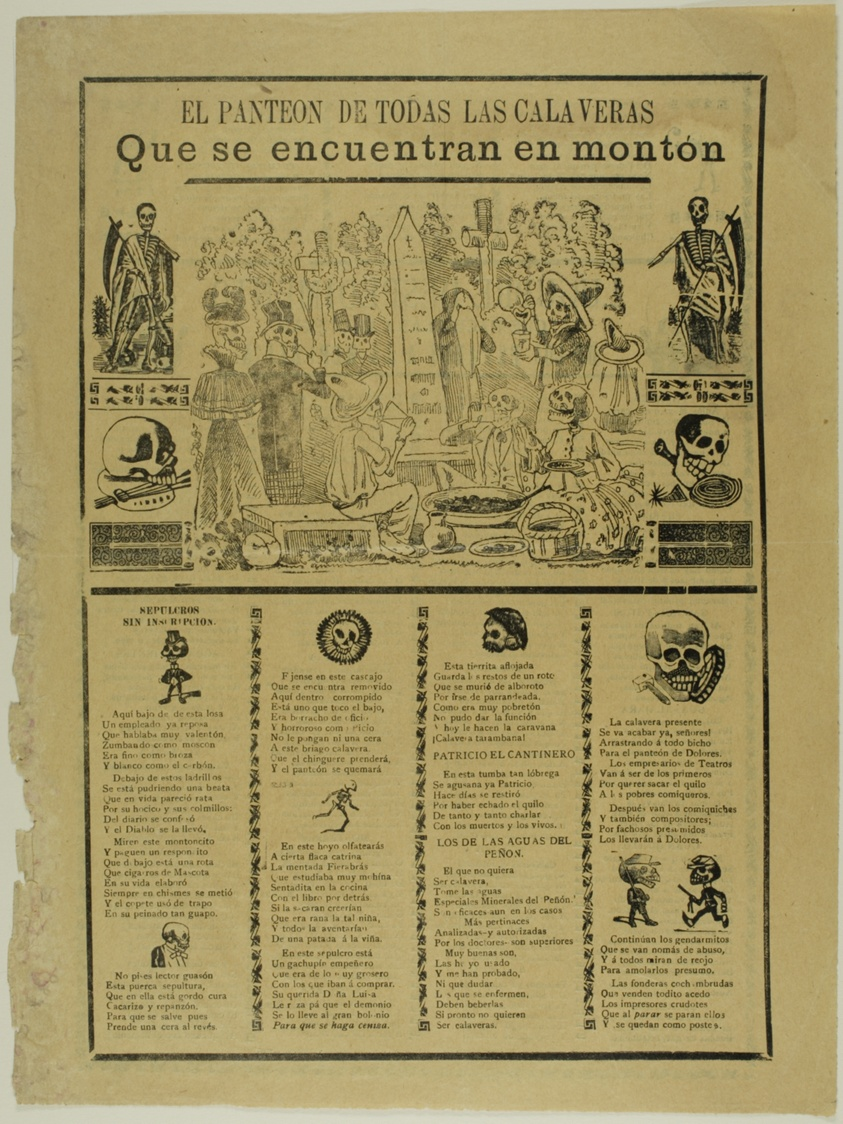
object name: Print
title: The Mausoleum of All the Calaveras That Are Found in a Heap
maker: José Guadalupe Posada (Mexican, 1852-1913)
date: 1905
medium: Photo relief etching and relief engraving on wove paper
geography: Mexico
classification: relief etching; print; prints and drawing